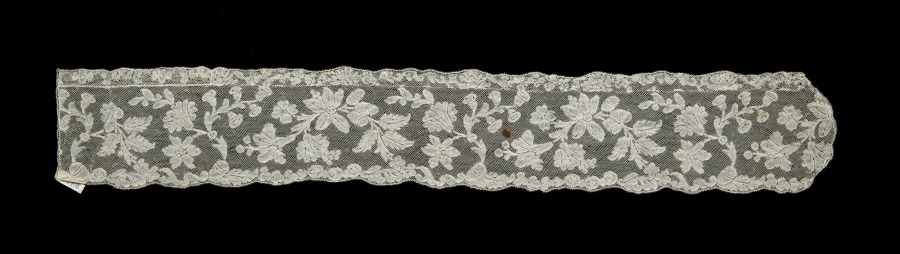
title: Fragment of a Lace Lappet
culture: France, Valenciennes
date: 1700s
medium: Bobbin lace (Valenciennes)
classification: Lace